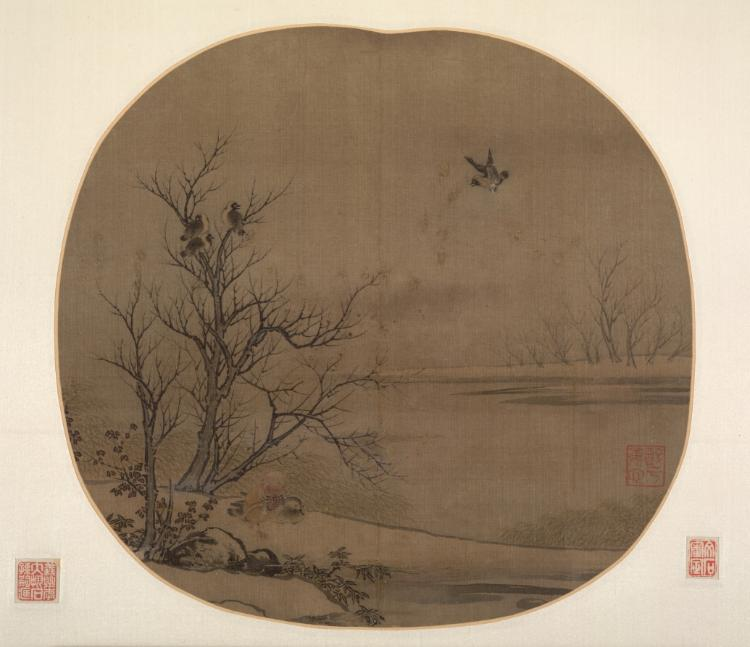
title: Birds and Ducks on a Snowy Islet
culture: China, Southern Song dynasty (1127-1279)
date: mid-1200s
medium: Album leaf; ink and slight color on silk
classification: Painting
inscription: 3 additional seals: 1 of Wu T'ing (c. 1600); 2 of Li Pao-hsun (1858-1915).